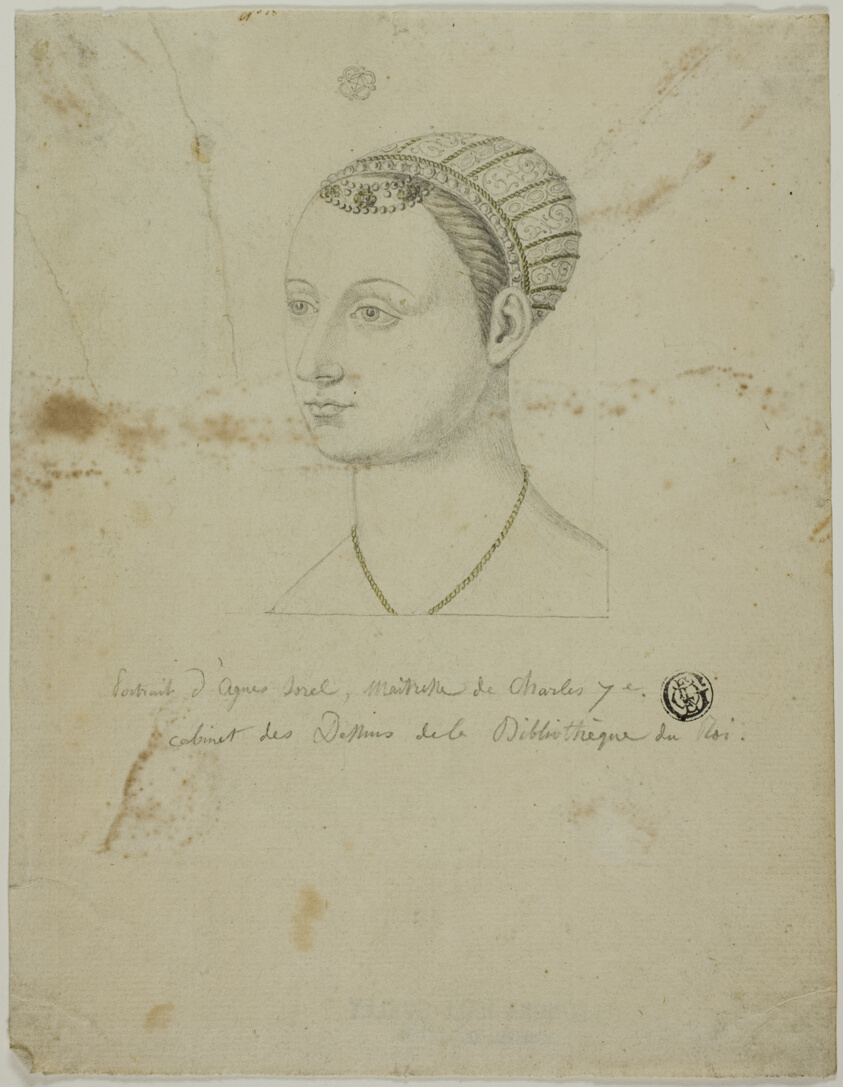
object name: Drawing and Watercolor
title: Portrait of Agnes Sorel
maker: Unknown Artist; French, 18th century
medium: Graphite, with touches of brush, and yellow and pale brown wash, on cream laid paper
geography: France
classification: graphite; drawings (visual works); prints and drawing